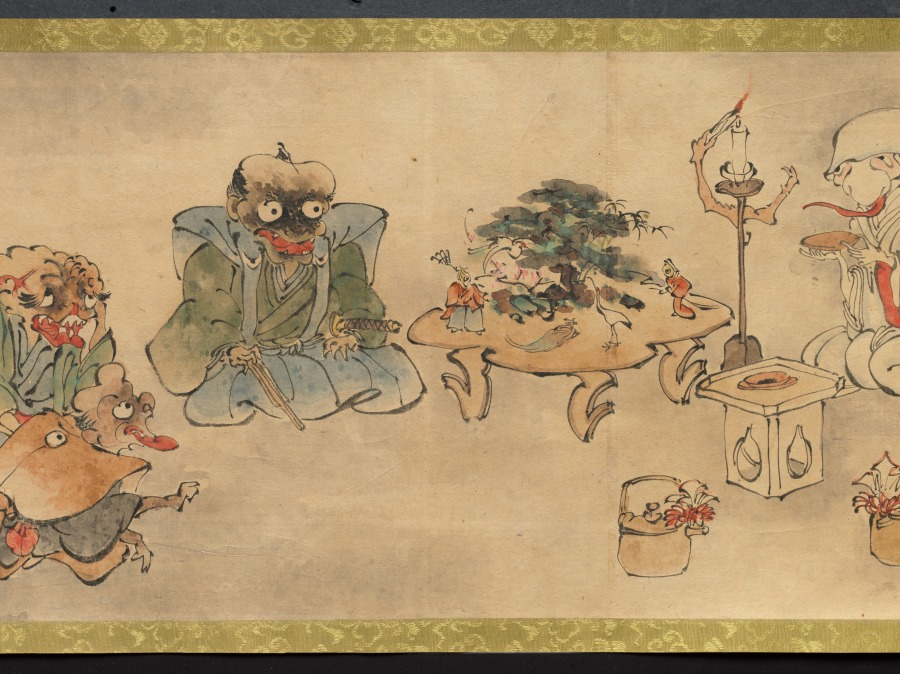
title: An Illustrated Marriage of Apparitions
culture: Japan, Edo period (1615–1868)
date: mid-1800s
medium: handscroll; ink and color on paper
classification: Painting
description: The matchmaking, engagement, wedding, and birth of the first child of two apparitions, or bakemono, literally "things that change," are illustrated in this whimsical, humorous handscroll. Japanese folklore abounds with such strange creatures, most famously represented in handscrolls featuring a procession of 100 supernatural monsters. Aside from a textual preface and cartouches indicating the content of the scenes, the tale is told visually. The artist and whereabouts of the original handscroll are unknown, but a number of other 19th-century copies by amateur painters exist in Japanese collections, attesting to its broad appeal.